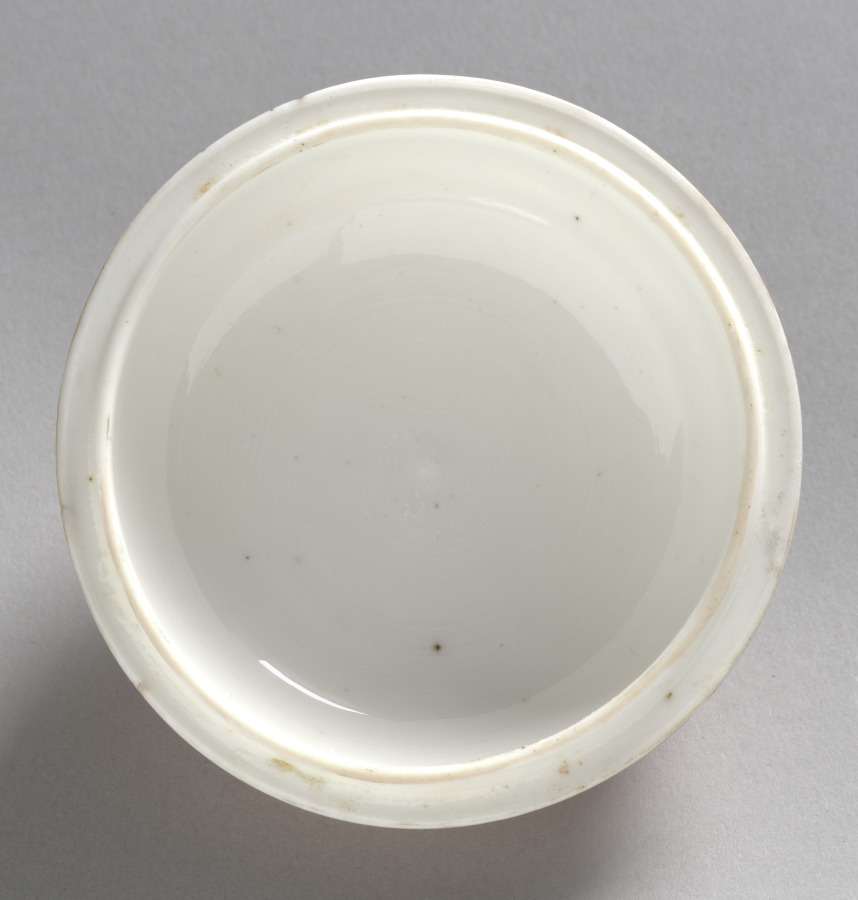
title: Cover for a Bowl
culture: France, 18th century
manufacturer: Niderviller Factory (French)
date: c. 1780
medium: porcelain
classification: Ceramic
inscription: inscribed at lower right corner of two trompe l'oeil prints: Niderviller.